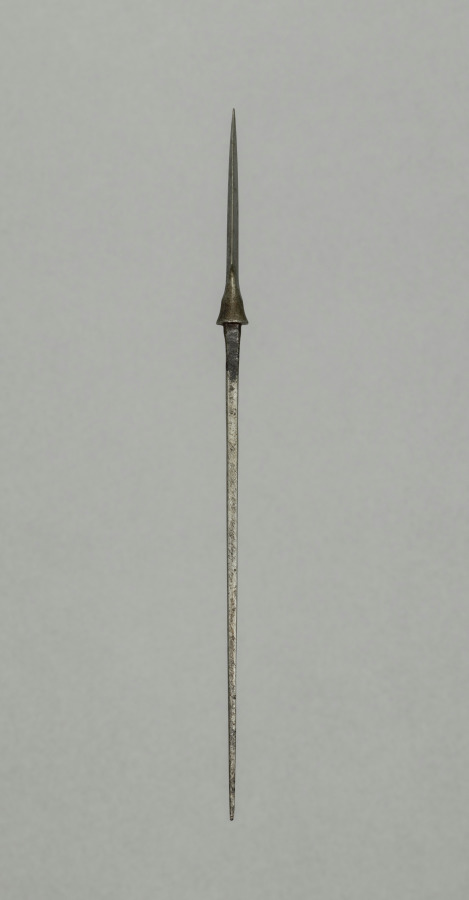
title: Arrow Point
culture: Japan, Edo period (1615–1868)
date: 1700s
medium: steel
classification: Arms and Armor